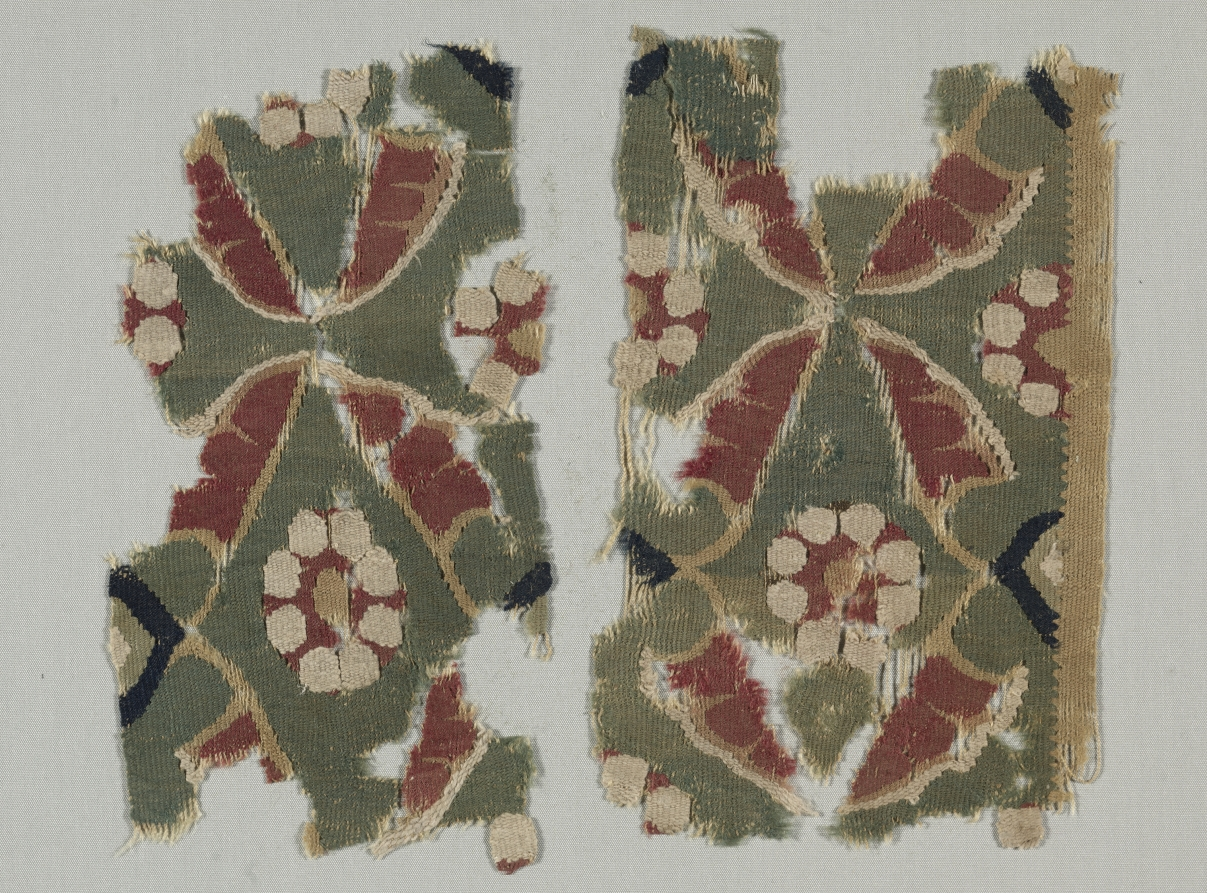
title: Fragment from a Large Hanging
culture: Iran or Iraq, Abbasid period (750–1258)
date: 800s–1000s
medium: Wool and cotton: tapestry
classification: Textile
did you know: Opposing pairs of half-acanthus leaves are arranged to form oval compartments enclosing eight-petaled rosettes.